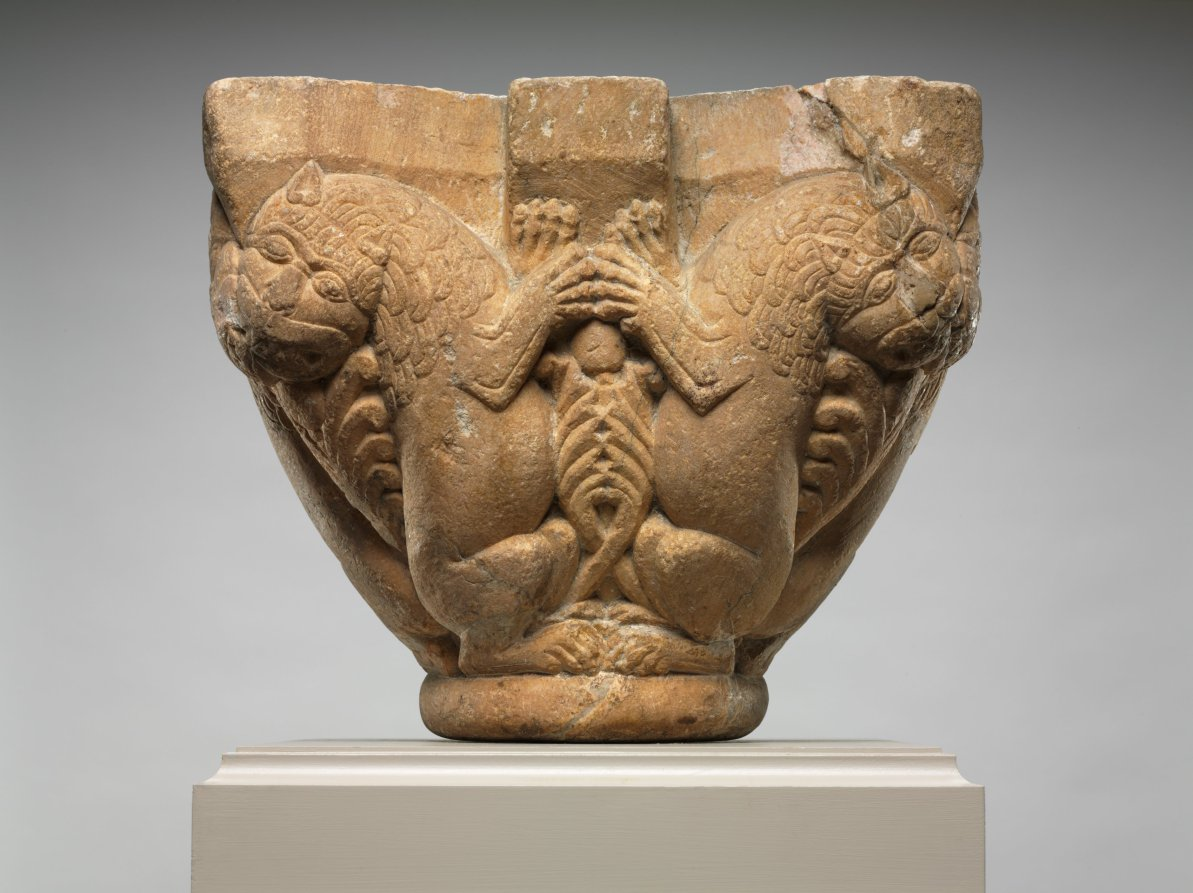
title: Engaged Capital with Lions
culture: Northern Spain (Navarre ?) or Southwest France (Pyrénées or Roussillon ?), mid-12th century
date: 1145–64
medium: marble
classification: Sculpture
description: The compositional motif of confronted and addorsed beasts illustrated on this capital was especially popular in churches along the pilgrimage roads.